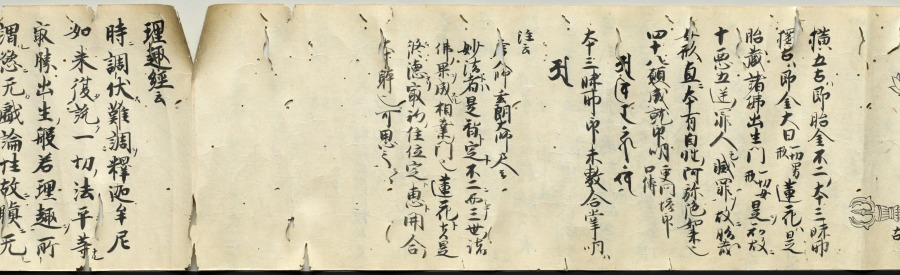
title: Scroll of Miscellaneous Notes written on a Calendar by Priest Seigen (recto)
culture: Japan, Kamakura period (1185–1333)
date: c. 1200–1231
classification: Manuscript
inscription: bears miscellaneous notes written by Priest Seigen.